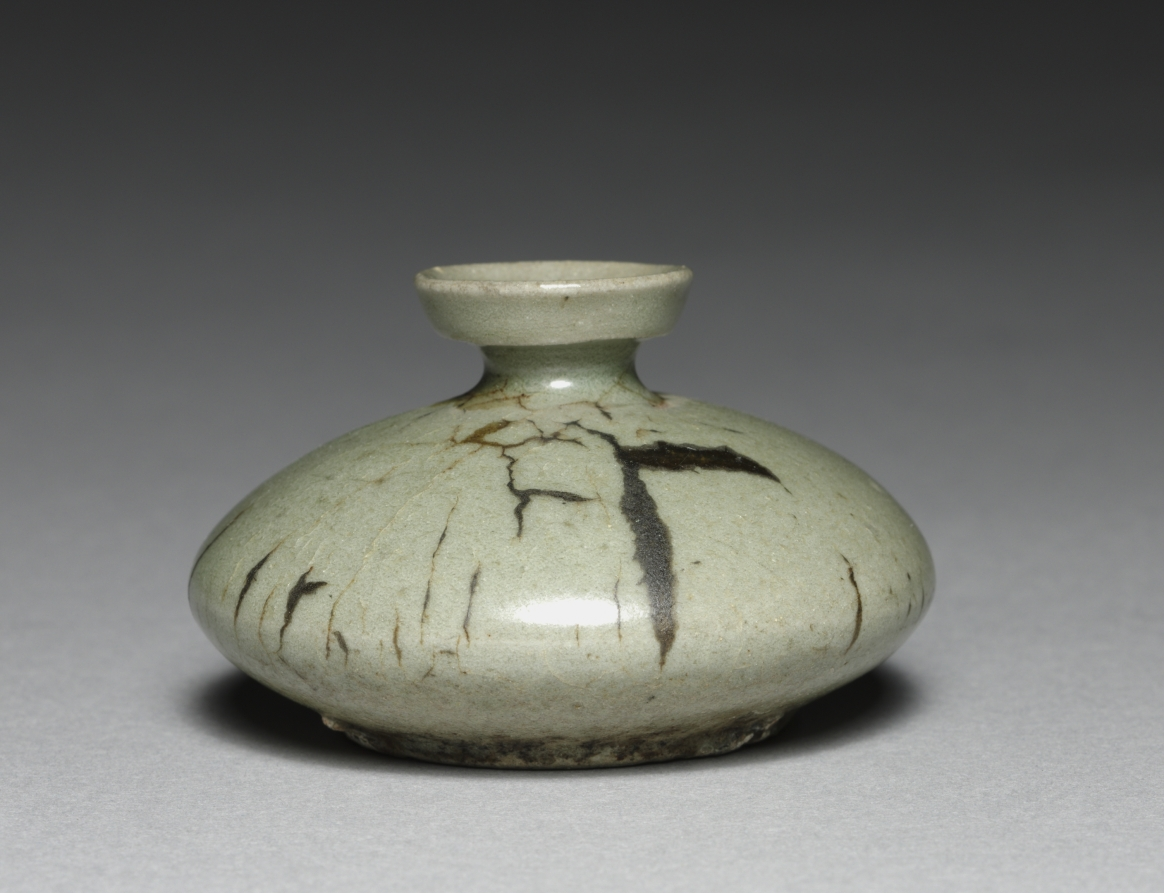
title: Oil Bottle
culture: Korea, Goryeo dynasty (918–1392)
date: 1100s–1200s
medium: celadon ware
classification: Ceramic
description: Celadons, spoons, seals, and bronze mirrors were the most common burial objects in tombs during the Goryeo period (918–1392). Once used to contain oil treatment for hair, this little celadon bottle was one of the standard goods that furnished elites' tombs.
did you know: This bottle was used to contain oil treatment for hair.